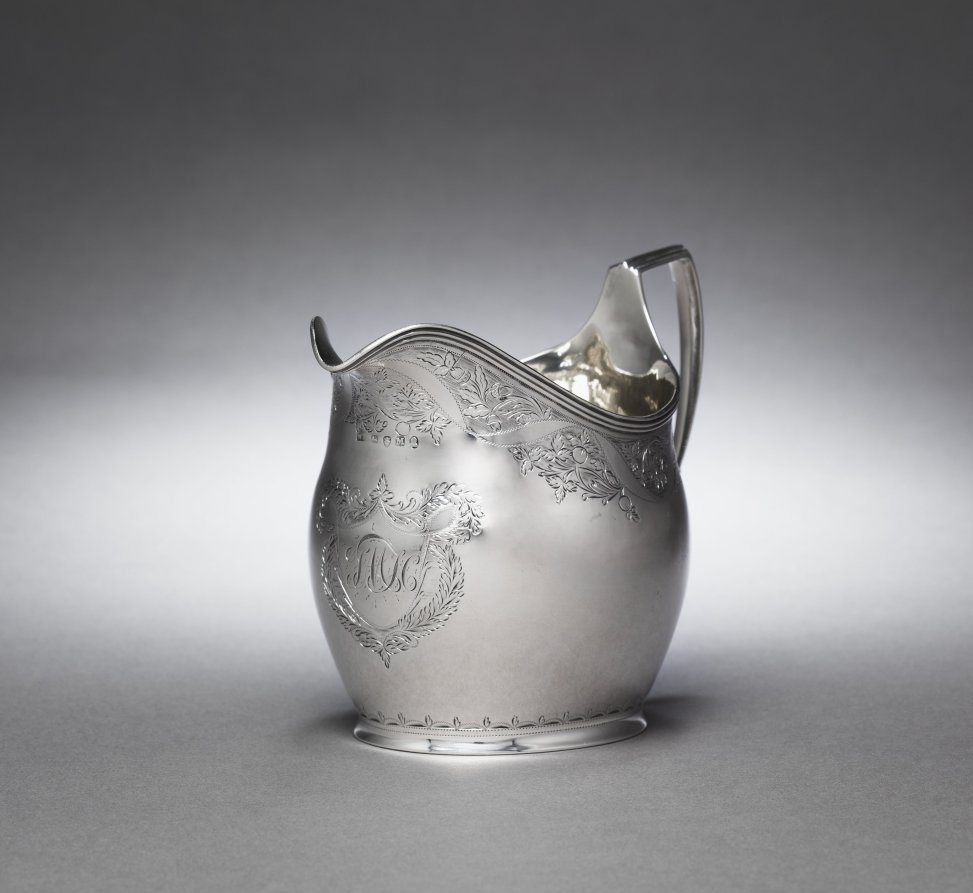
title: Tea Service (Creamer)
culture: London, England, 19th century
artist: Anne Bateman (British, 1748–1813)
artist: Peter Bateman (British, 1740–1825)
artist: William (I) Bateman (British, 1774–1850)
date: 1807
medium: silver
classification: Silver